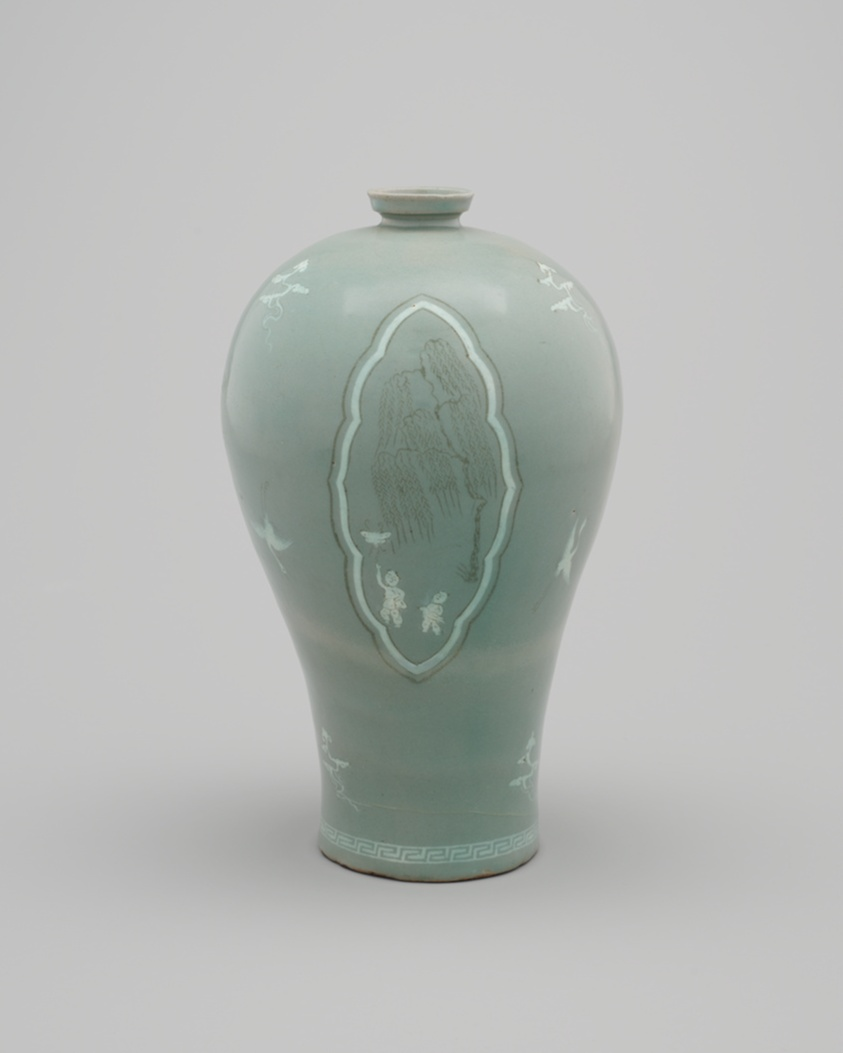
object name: Vessel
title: Plum Vase (Maebyeong) with Clouds, Cranes, and Children Motifs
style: Korean (culture or style), koryŏ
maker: Korea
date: Goryeo dynasty (918–1392), late 12th century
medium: Stoneware with red and white slip and celadon glaze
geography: Korea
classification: vase; vessel; stoneware; ceramics; asian art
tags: children, green (color), clouds, cranes, birds, animals, trees, plants, bamboo